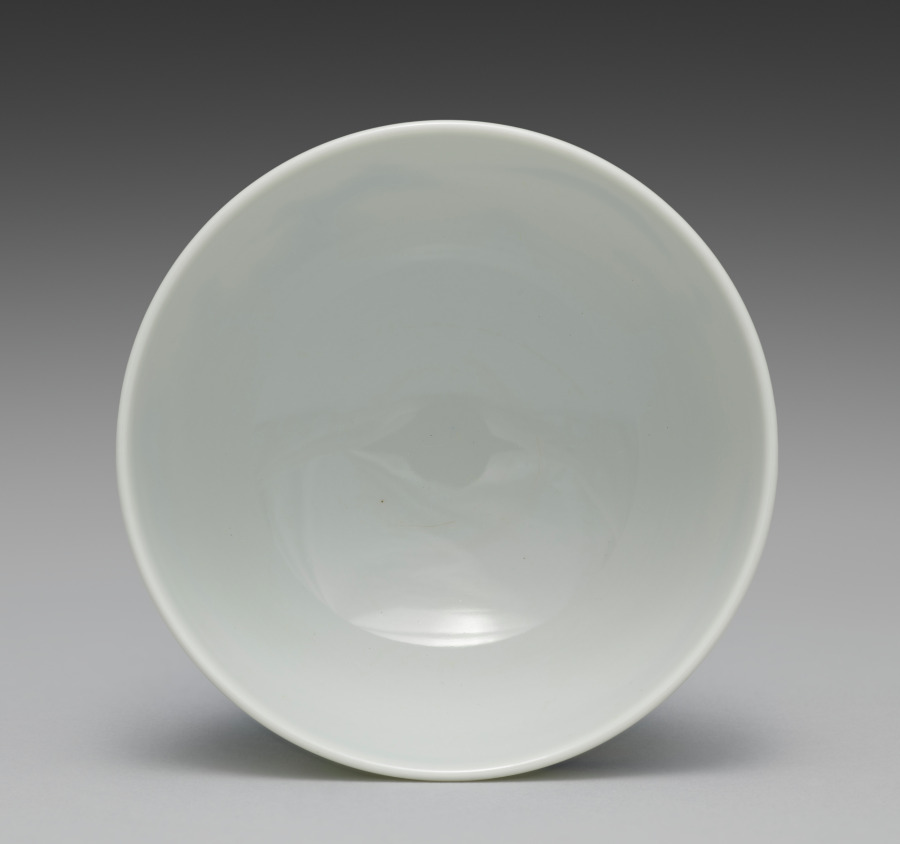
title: Teacup from Tea Set with Chinese Landscape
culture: Japan, Meiji period (1868–1912)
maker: Seifū Yohei III (Japanese, 1851–1914)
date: 1893–1914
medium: Porcelain with underglaze blue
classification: Ceramic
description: This tea set has a side-handled pot called a kyūsu, used for steeping, straining, and serving tea. Unlike some others, this set also has a yuzamashi, a container used to cool boiled water to just the right temperature for the best flavor when steeping. Seifū Yohei III’s painting teacher, Tanomura Chokunyū (1814–1907), made a visual record of famous sencha events that shows how these kinds of porcelains fit with objects such as a stove and kettle to form a complete set of utensils for tea preparation, and with ensembles of decorative objects meant to inspire creativity. The theme of this sencha tea set is the Chinese scholar-recluse in an idyllic landscape. Each of the five teacups has a landscape with an architectural structure and some human activity.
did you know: This cup shows a man in a traveling robe leaning upon his staff as he crosses a bridge to reach a two-story building with a pitched roof, possibly a temple, set between trees. Past this structure, another man sits fishing in a boat.